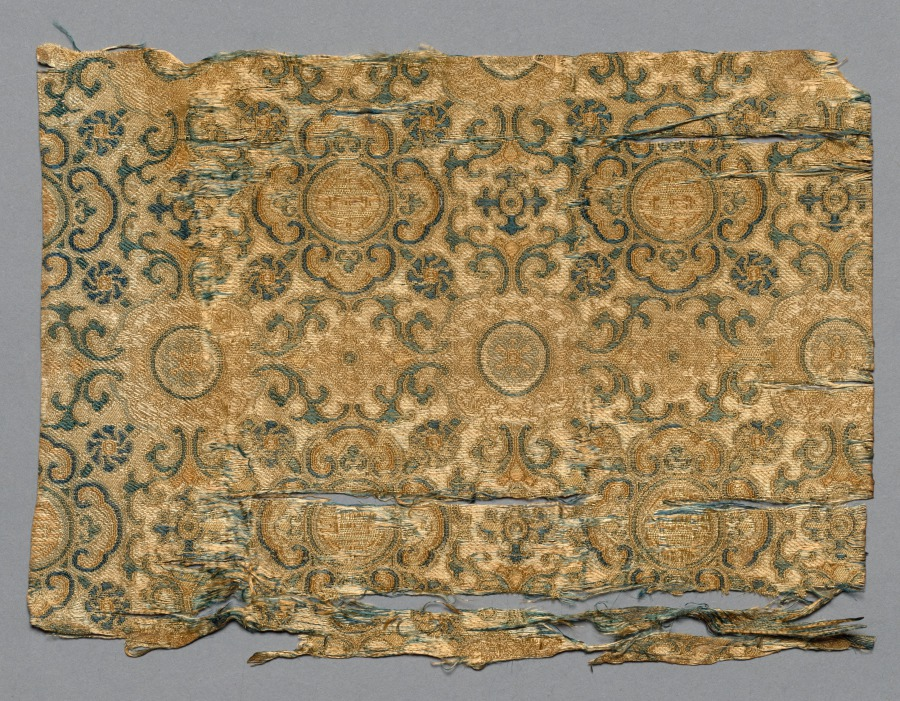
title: Fragment from Book of Textiles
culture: China, Qing dynasty (1644-1911)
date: 1700s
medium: silk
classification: Textile